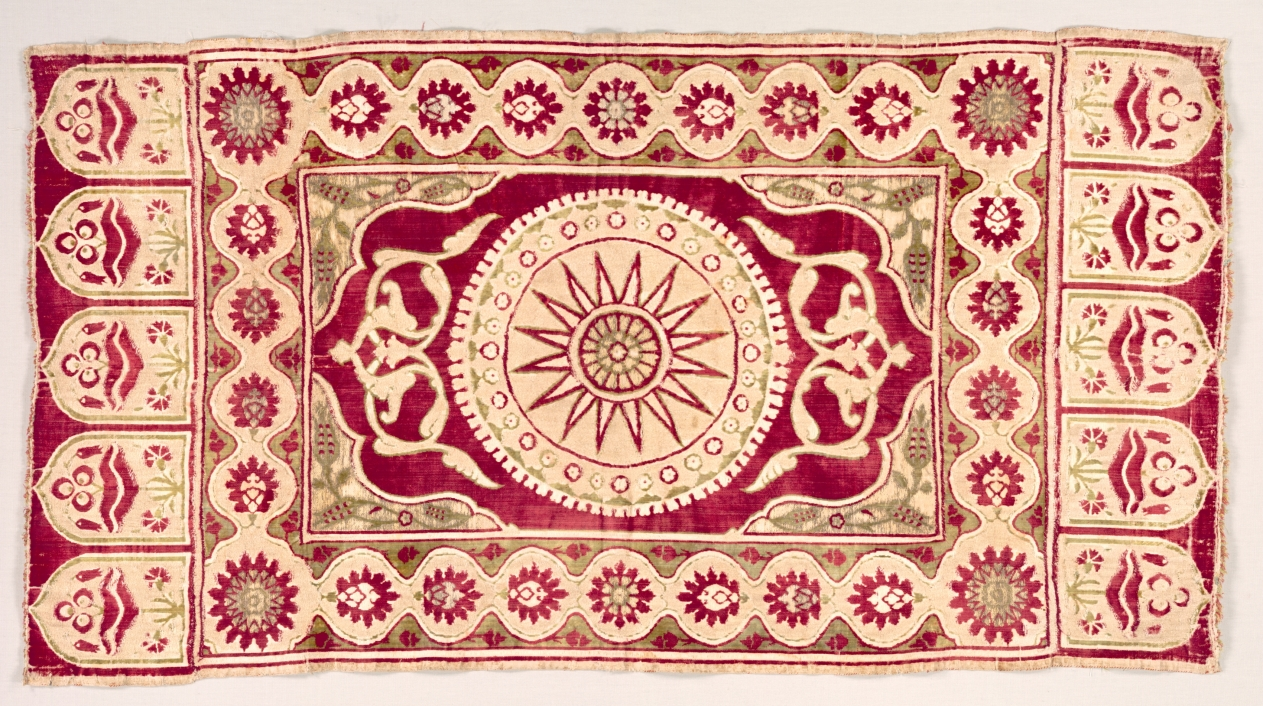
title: Velvet Divan Cushion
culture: Turkey, 17th century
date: 17th century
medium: velvet; silk (formerly on silver ground, which is now worn and darned)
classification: Velvet